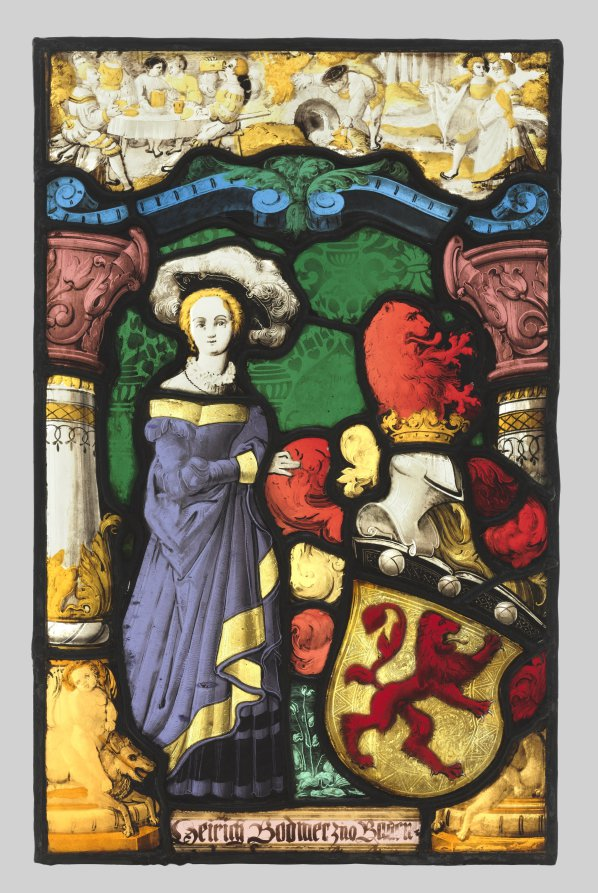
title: The Arms of Heinrich Bodmer of Baden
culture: Switzerland, Baden, 16th century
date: c. 1530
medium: pot-metal and white glass, silver stain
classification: Glass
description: For over two hundred years, Swiss craftsmen were preeminent in the production of heraldic glass. They executed coats-of-arms of individuals, families, cantons, and guilds, often inspired for their compositions by contemporary engravings and paintings.